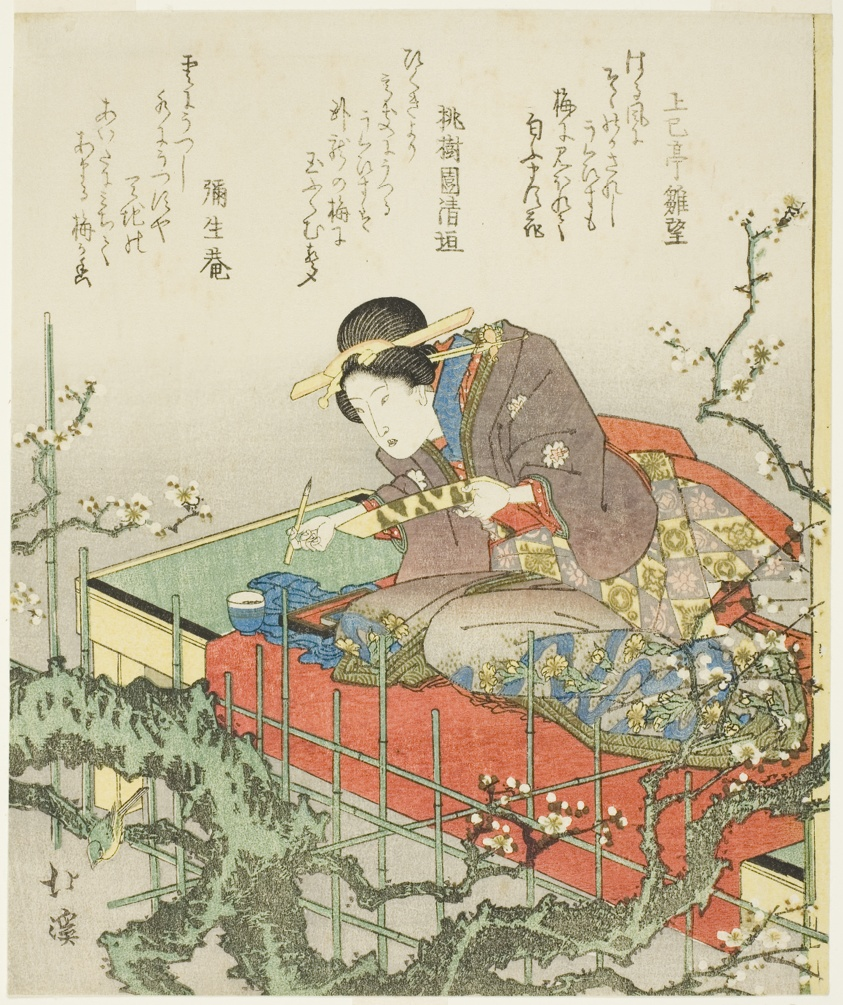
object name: Print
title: Seated woman holding brush and poem card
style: Japanese (culture or style)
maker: Totoya Hokkei (Japanese, 1780-1850)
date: early 1830s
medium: Color woodblock print; shikishiban, surimono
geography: Japan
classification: woodblock print; print; asian art